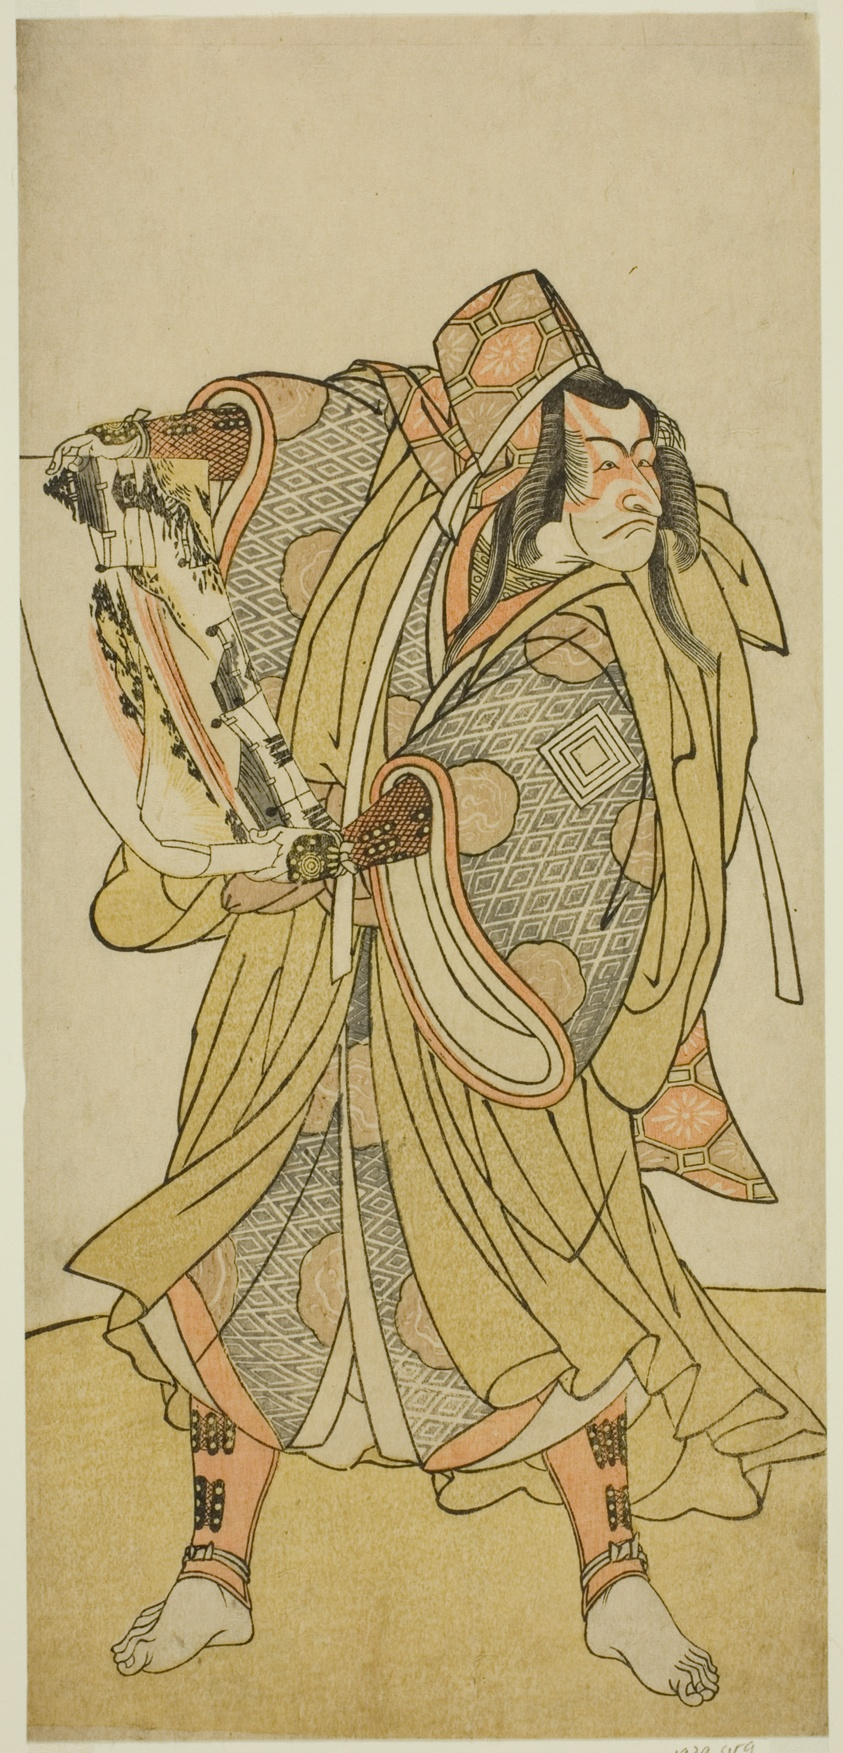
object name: Print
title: The Actor Ichikawa Danjuro V as Kazusa no Akushichibyoe Kagekiyo in the Play Edo no Hana Mimasu Soga, Performed at the Nakamura Theater in the Third Month, 1783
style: Japanese (culture or style)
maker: Katsukawa Shunjo; Japanese, died 1787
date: c. 1783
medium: Color woodblock print; hosoban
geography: Japan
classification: woodblock print; print; asian art